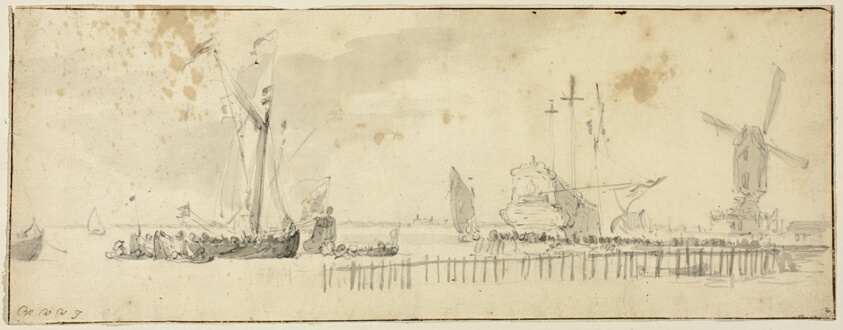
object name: Drawing and Watercolor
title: Sailing Ships in Harbor near Windmill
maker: Willem van de Velde, II (Dutch, 1633-1707)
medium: Graphite with brush and gray wash, on tan laid paper, laid down on board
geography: Holland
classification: ink or chalk wash; drawings (visual works); prints and drawing